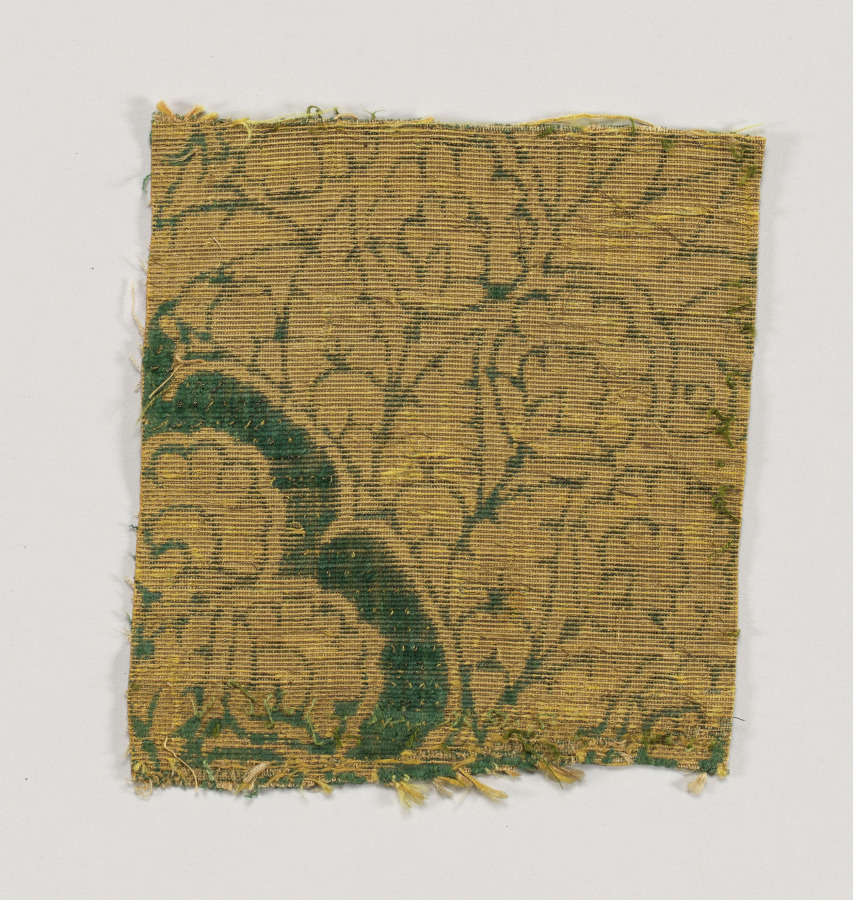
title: Velvet Fragments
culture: Spain, early 16th century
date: early 16th century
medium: velvet (cut, voided, and brocaded): silk and gold thread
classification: Velvet